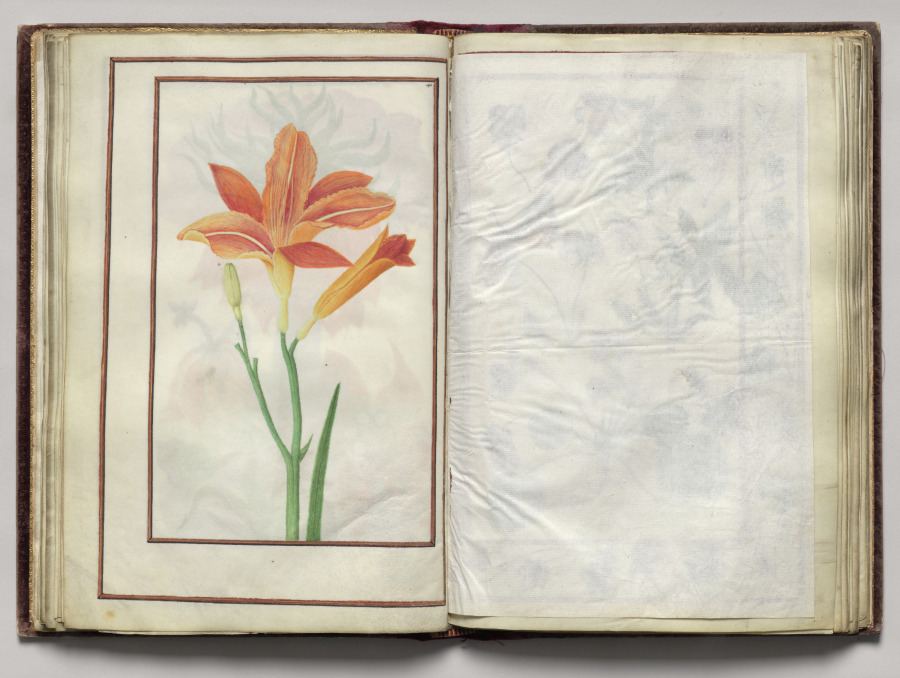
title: Florilegium (A Book of Flower Studies)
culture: France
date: 1608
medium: bound manuscript of 48 leaves, 77 drawings; watercolor, ink, silver, and gold over occasional traces of pencil, on vellum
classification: Bound Volume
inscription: Dated: Poitiers 1608 (on frontispiece) Signed: On frontispiece in black ink, lower right: Van Kuyk Notation on drawing: Frontispiece: in pencil, lower margin: * élève de Van Kessel, peintre flammand (* in pencil also appears in front of Van Kuyk's name).